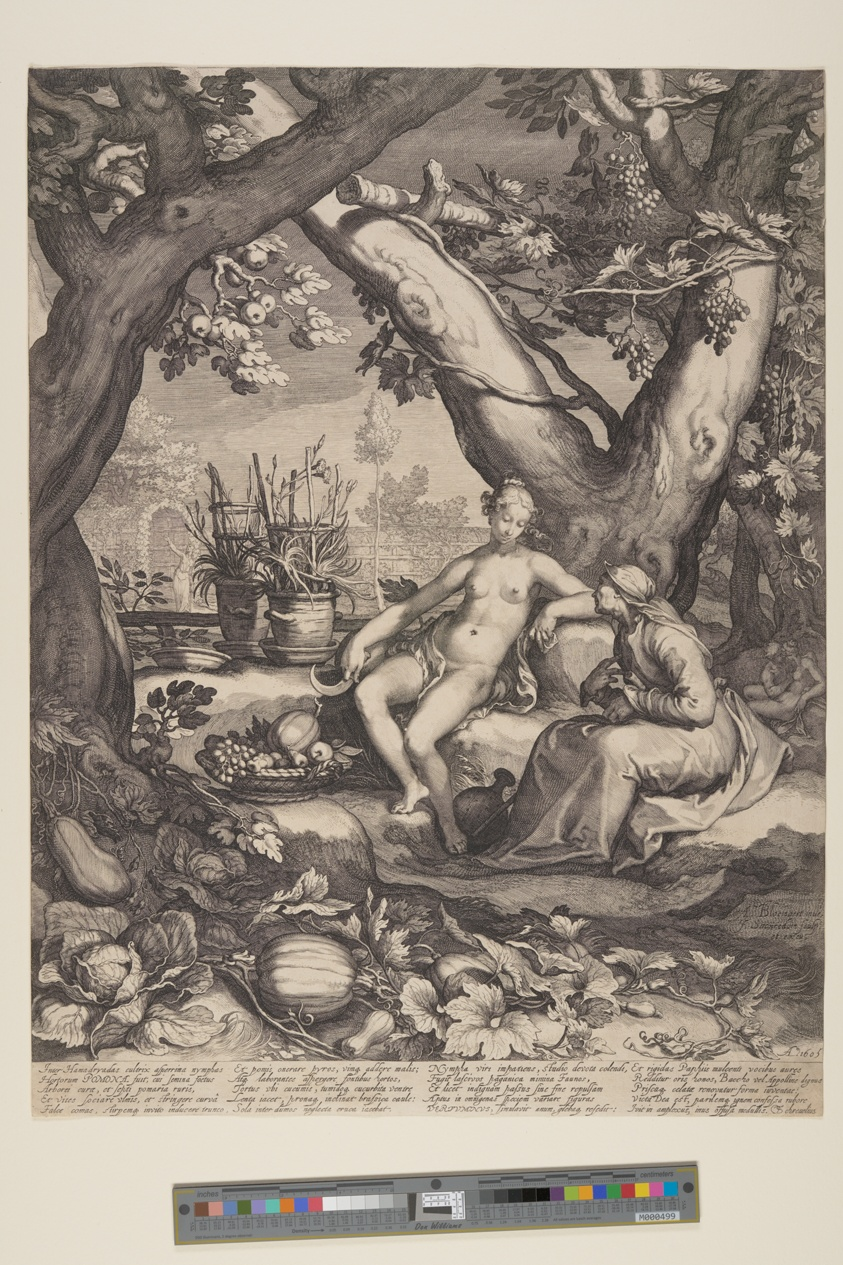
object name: Print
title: Vertumnus and Pomona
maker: Jan Saenredam (Dutch, 1565–1607); after Abraham Bloemaert (Dutch, 1566–1651)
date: 1605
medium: Engraving on ivory laid paper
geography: Netherlands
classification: engraving; paper; print; prints and drawing